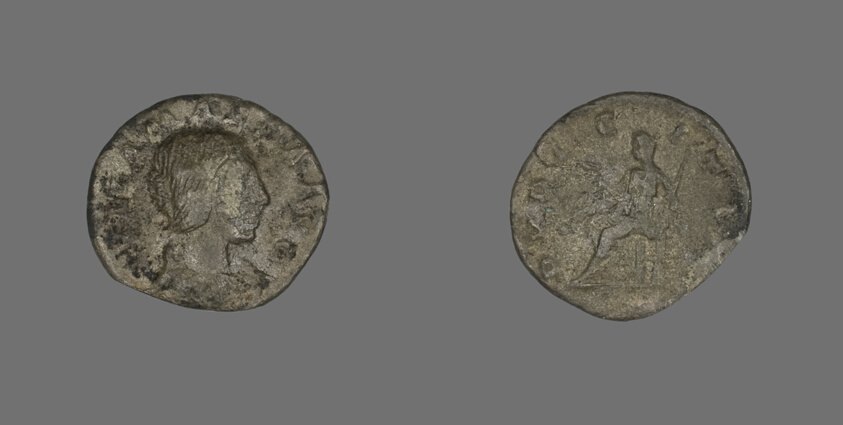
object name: Coin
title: Denarius (Coin) Portraying Julia Maesa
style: roman (ancient, style or period), ancient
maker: Roman; minted in Antioch (now Turkey)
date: 223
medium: Silver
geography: Roman Empire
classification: coin; ancient art